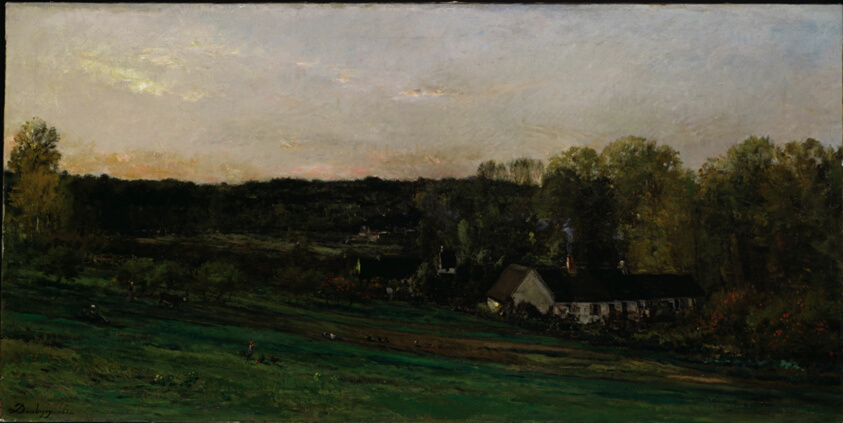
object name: Painting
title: House of Mère Bazot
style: 19th century, Barbizon School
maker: Charles François Daubigny (French, 1817–1878)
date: 1874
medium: Oil on canvas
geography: France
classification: painting; france; french; oil on canvas; oil paintings (visual works); european painting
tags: house, skanda karttikeya, trees, hills, landscape, houses, French, France